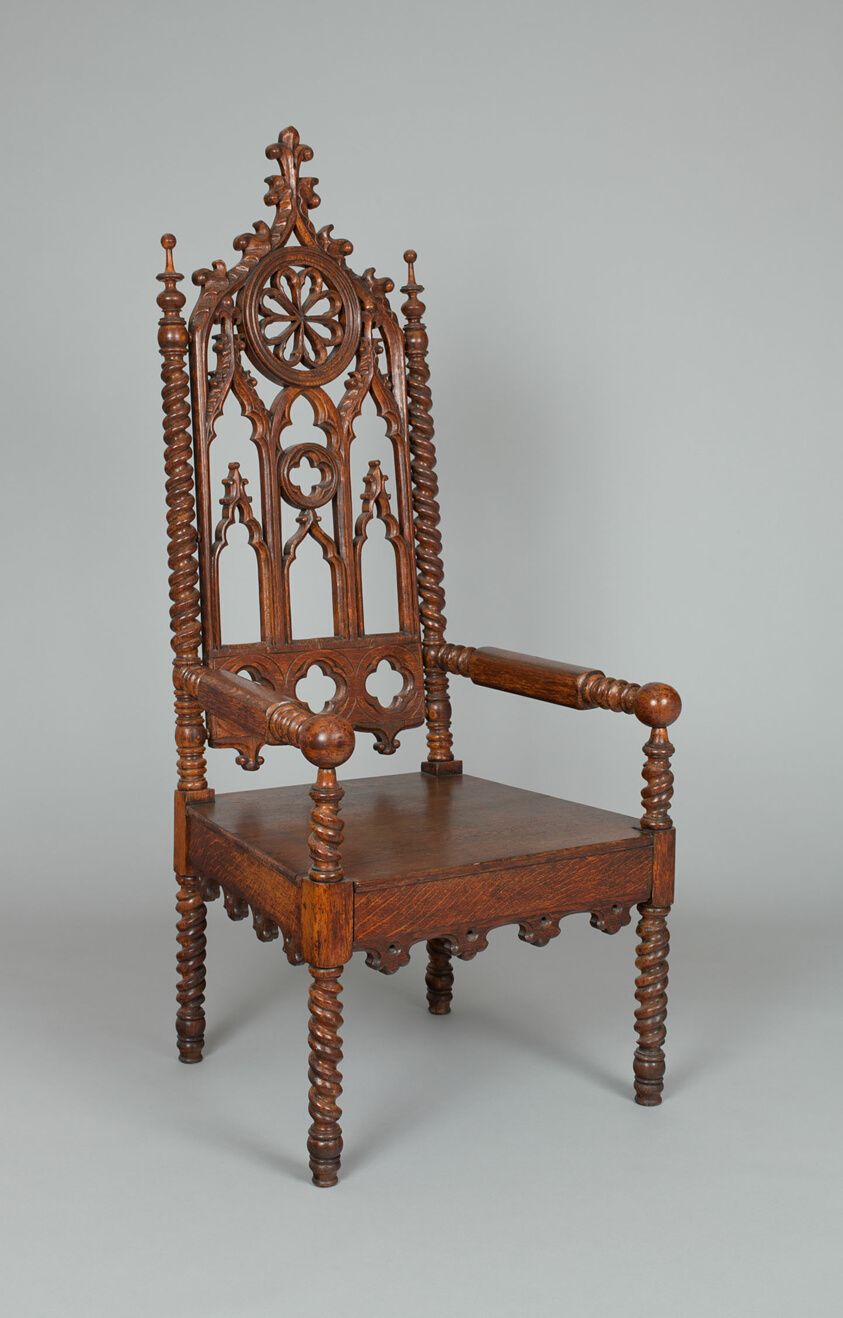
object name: Furniture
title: Armchair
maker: Artist unknown (American, 19th century); New York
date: 1840–60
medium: Oak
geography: New York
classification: seating; furniture; american decorative arts; american arts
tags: furniture